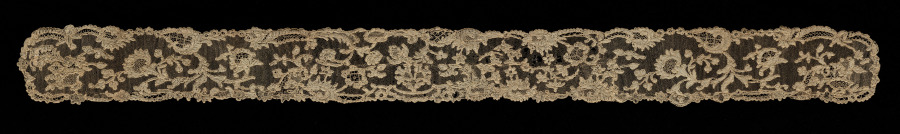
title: Lace Edging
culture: France, Alençon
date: 1715–74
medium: Linen: needle lace (Point d'Alençon)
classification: Lace